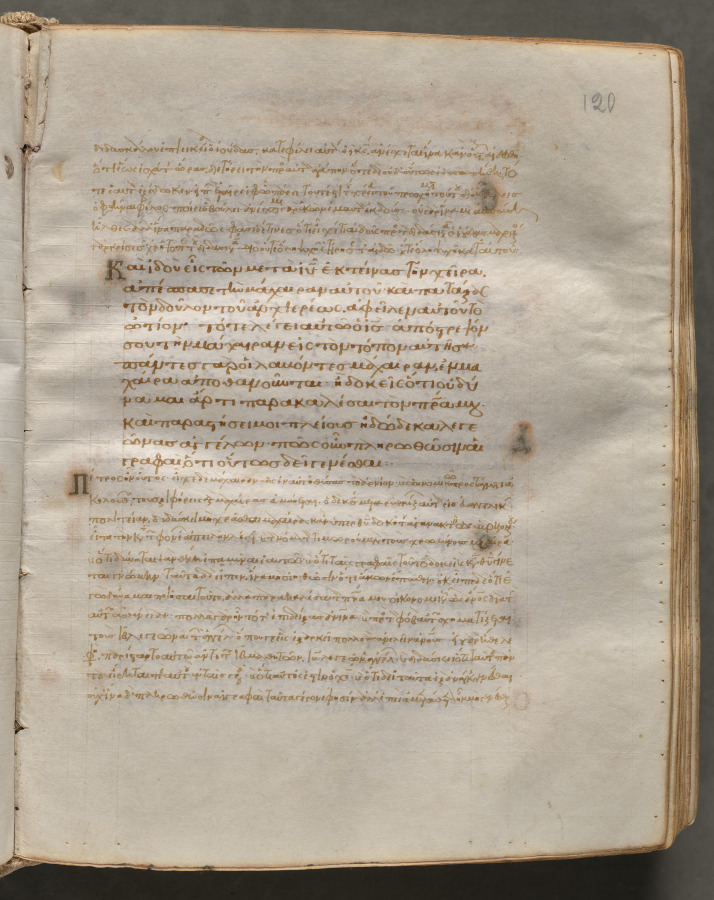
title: Text, folio 120 (recto), from a Gospel Book with Commentaries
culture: Byzantium, Constantinople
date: c. 1000–1100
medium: ink, tempera, and gold on vellum; leather binding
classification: Bound Volume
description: Each of the four gospels in this book opens on a page with brilliantly illuminated borders depicting the author of the text as well as birds-principally peacocks, symbols of the immortality of the soul-and fountains, representing the fountain of life and the salvation of the soul. This volume consists of 428 leaves with texts in Greek. Its level of sophistication suggests that it was probably written and decorated in a monastery in Constantinople.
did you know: Gospel Books were carried in procession through Byzantine churches.